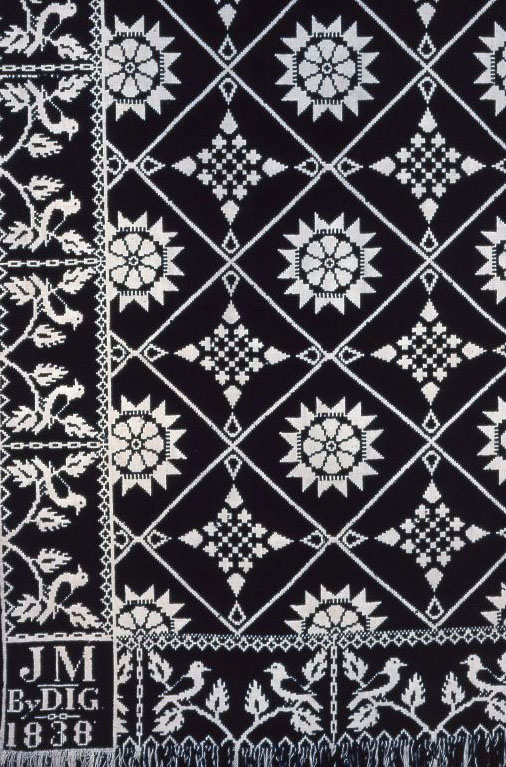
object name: Textile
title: Coverlet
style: 19th century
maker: David Isaac Grave (American, c. 1803-1864); United States, Indiana, Wayne County, Richmond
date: 1838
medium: Cotton and wool, plain weave double cloth; woven on loom with Jacquard attachment; two loom widths joined; fringed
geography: Indiana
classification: weaving - coverlet; coverlet; weaving; textile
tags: geometric, foliage, birds, squares, circles, diamond shapes, coverlet